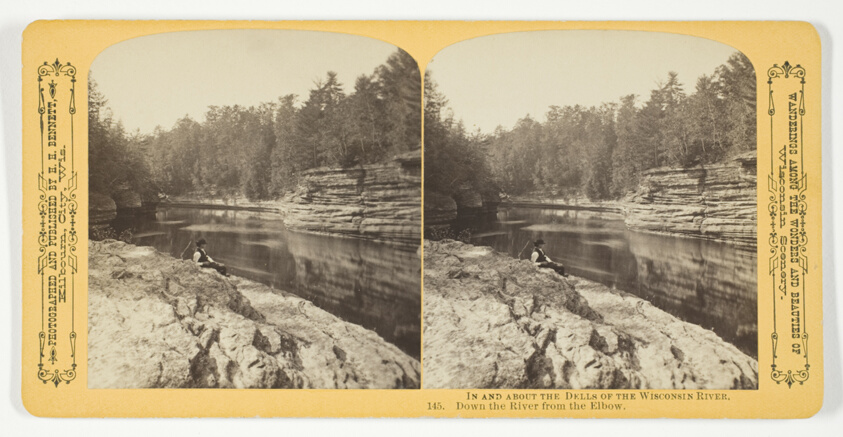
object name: Photograph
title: Down the River from the Elbow, No. 145 from the series "In and About the Dells of the Wisconsin River"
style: 19th century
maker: Henry Hamilton Bennett (American, born Canada, 1843-1908)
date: 1870/1908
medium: Albumen print, stereo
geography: Wisconsin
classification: photography; photograph; albumen silver print; stereograph (albumen)